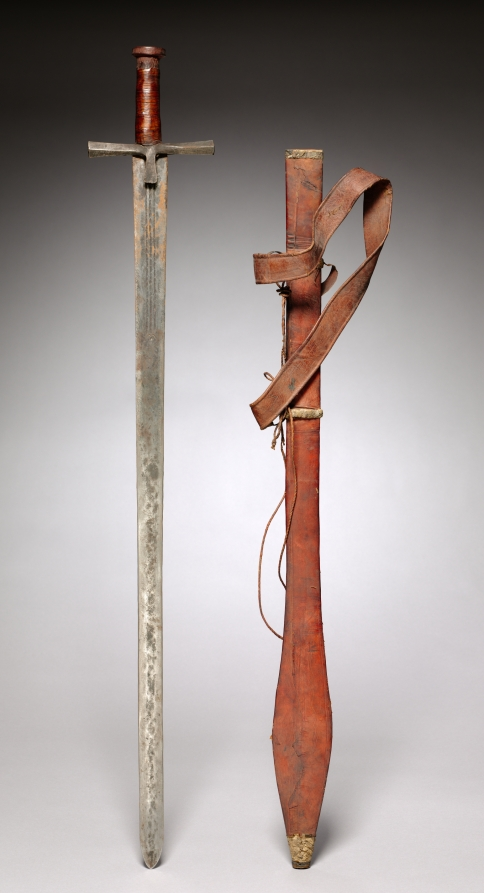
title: Sword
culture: Africa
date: 1900s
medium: Iron, leather, wood, metal, and plant fiber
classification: Arms and Armor